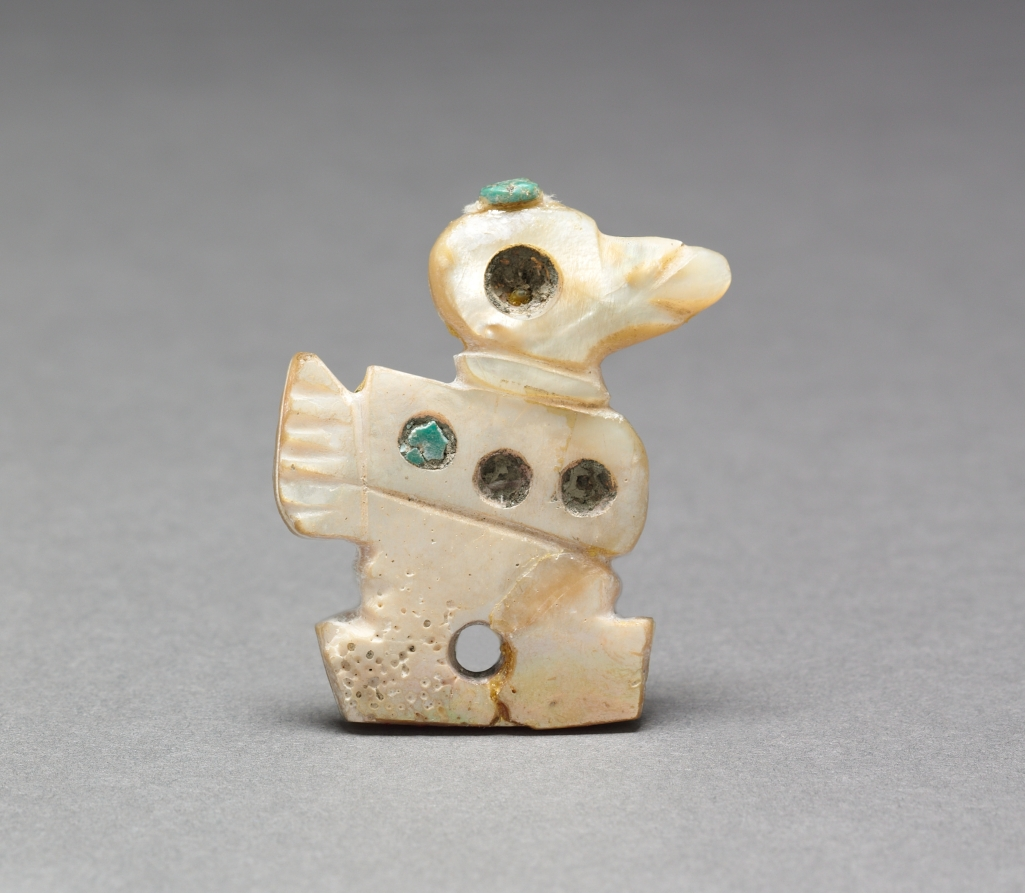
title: Bird Ornament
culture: North coast of Peru, Cupisnique style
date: c. 900–600 BCE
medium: shell with stone inlay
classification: Jewelry